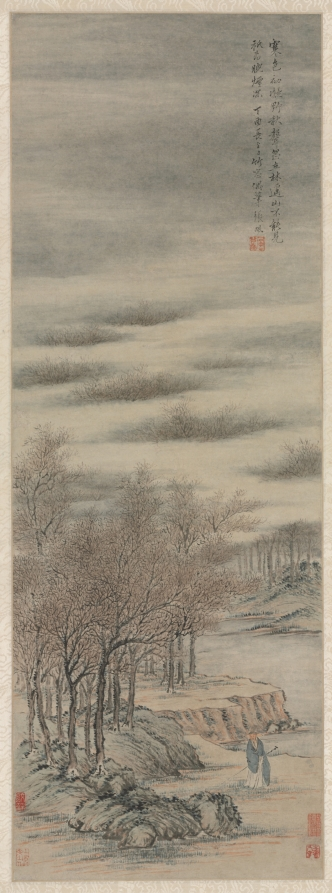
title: Listening to the Sound of Autumn in a Misty Grove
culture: China, Qing dynasty (1644-1911)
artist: Zhang Feng (Chinese, active c. 1632–1662)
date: 1657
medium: Hanging scroll; ink and color on paper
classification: Painting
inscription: Artist's inscription, signature, and 2 seals: Frosty colors have just appeared throughout the countryside,/ Autumn sounds echo unexpectedly through the trees./ The distant mountains cannot be seen,/ As the evening mist spreads, thicker and deeper./ Casually painted at the bamboo window on the solstice day of the dingyou year [1657]. Zhang Feng. [seal] Feng. [seal, lower left corner] Shangyuan Laoren. (Translation by LYSL/HK/WKH)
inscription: 3 additional seals: 1 of Fa Liang (Qing Dynasty); 2 unidentified.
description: Zhang Feng from Nanjing passed the local government examinations shortly before the fall of the Ming dynasty. With the Manchu conquest, he joined the ranks of loyalists who refused to serve the new regime. He chose the intermittently frugal life of a Buddhist adept. Many of his paintings lament the loss of the empire. In this scroll, he depicts a lone figure in a stark landscape of frosty atmosphere enshrouded in mists. Close looking reveals red strokes that color the grounds, a way of expressing his loyalty to the Ming whose family name Zhu means red.